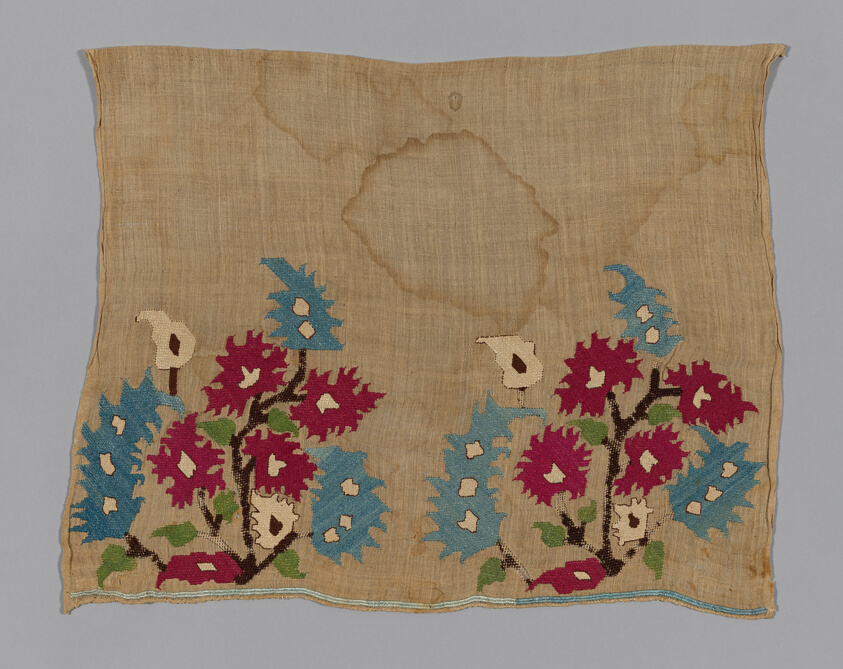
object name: Textile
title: Fragment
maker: Turkey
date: 17th century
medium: Embroidered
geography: Turkey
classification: textile; needlework (visual works); weaving